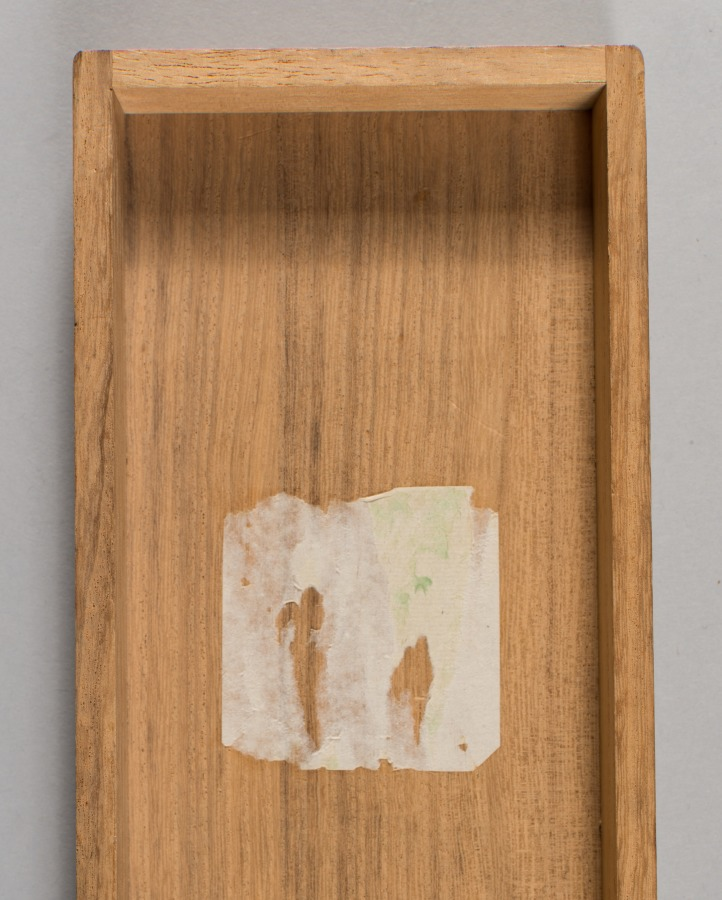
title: Looking for a Monastery in the Misty Mountains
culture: China, Ming dynasty (1368–1644)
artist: Chen Chun (Chinese, 1483–1544)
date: 1500–1544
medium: hanging scroll, ink on paper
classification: Painting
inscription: Artist's inscription, signature, and 2 seals: Row after row of misty trees envelop the Buddhist Monastery./ But the rustic who comes to find it will not lose his way./ Just across the wooden bridge, the dusty world is cut off;/ Among the countless falling petals, birds are singing confusedly. Daofu 道複 composed [this]. [seals] Fufu shi 復甫; Baiyang shanren 白陽山人. trans. WKH/LYSL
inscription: 3 additional unidentified seals.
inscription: 1 additional unidentified seal on the back of the mounting.